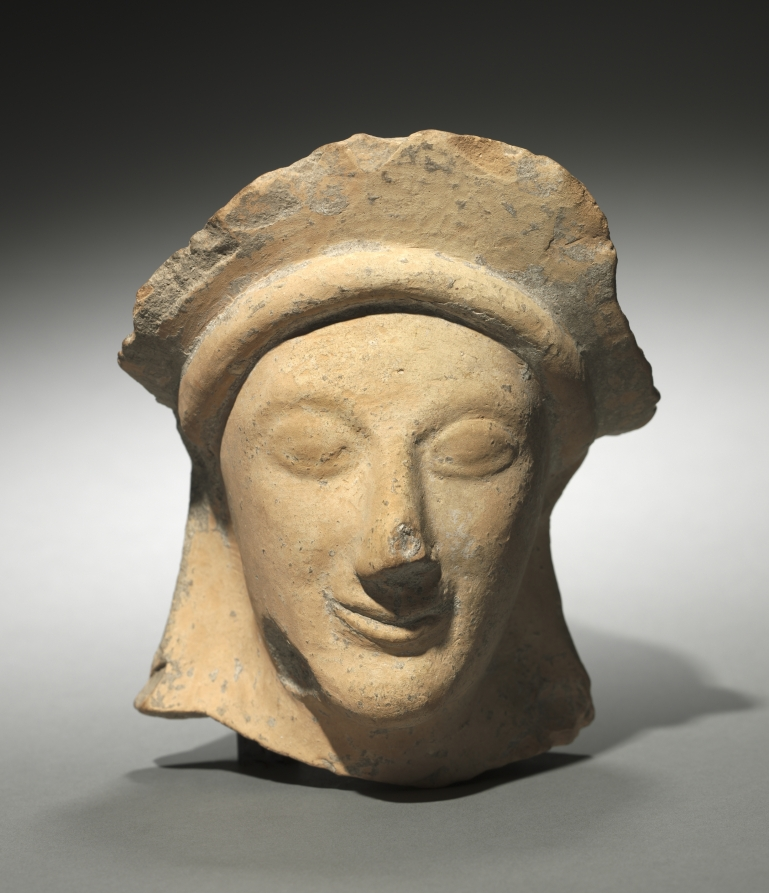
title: Woman's Head with Crown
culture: Greece, Sicily(?)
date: 500s BCE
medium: terracotta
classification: Sculpture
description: This terracotta sculpture depicts a woman with a wide headdress that is partly broken off. Her face is rendered in an Archaic style, with her mouth and eyes in low relief and her lips lifting upward in a serene smile. Originally, details such as the eyes and decoration on the headdress would probably have been painted on the surface of the sculpture.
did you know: In ancient Greek sculpture, a wide crown often denoted a matron deity like Hera or Demeter.